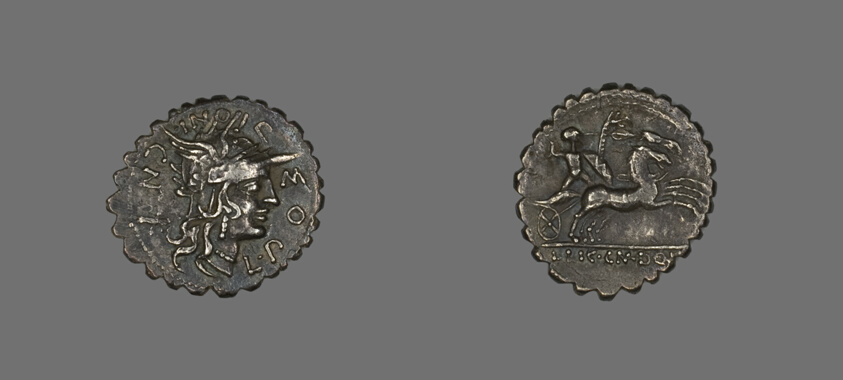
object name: Coin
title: Denarius Serratus (Coin) Depicting the Goddess Roma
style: republic period, ancient, roman (ancient, style or period)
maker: Roman, minted in Narbo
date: 118 BCE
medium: Silver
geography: Italy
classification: coin; ancient art; struck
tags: goddesses, Chariots